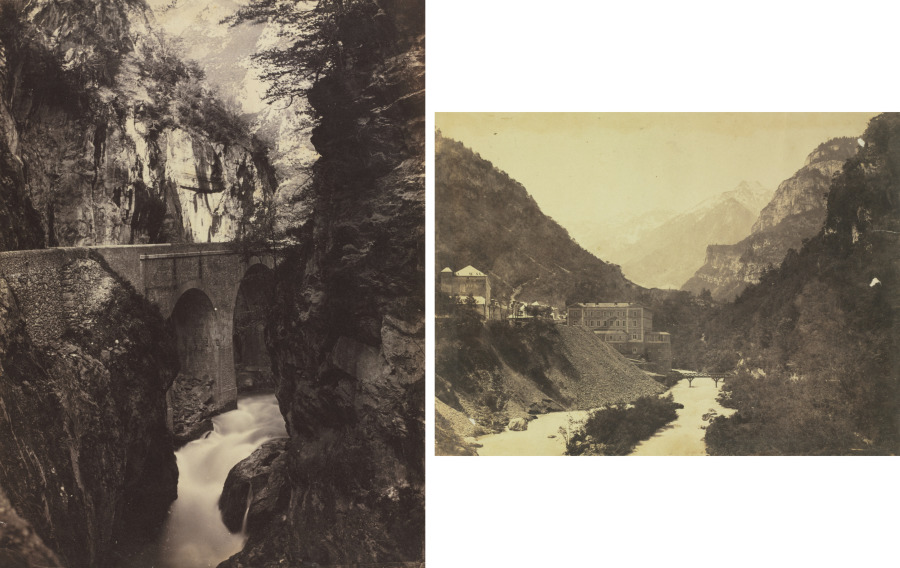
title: Road to Eaux-Chaudes, Pyrenees (recto); Eaux-Chaudes, Pyrenees (verso)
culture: England, 19th century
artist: Farnham Maxwell Lyte (British, 1828–1906)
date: c. 1855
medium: albumen print from wet collodion negative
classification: Photograph